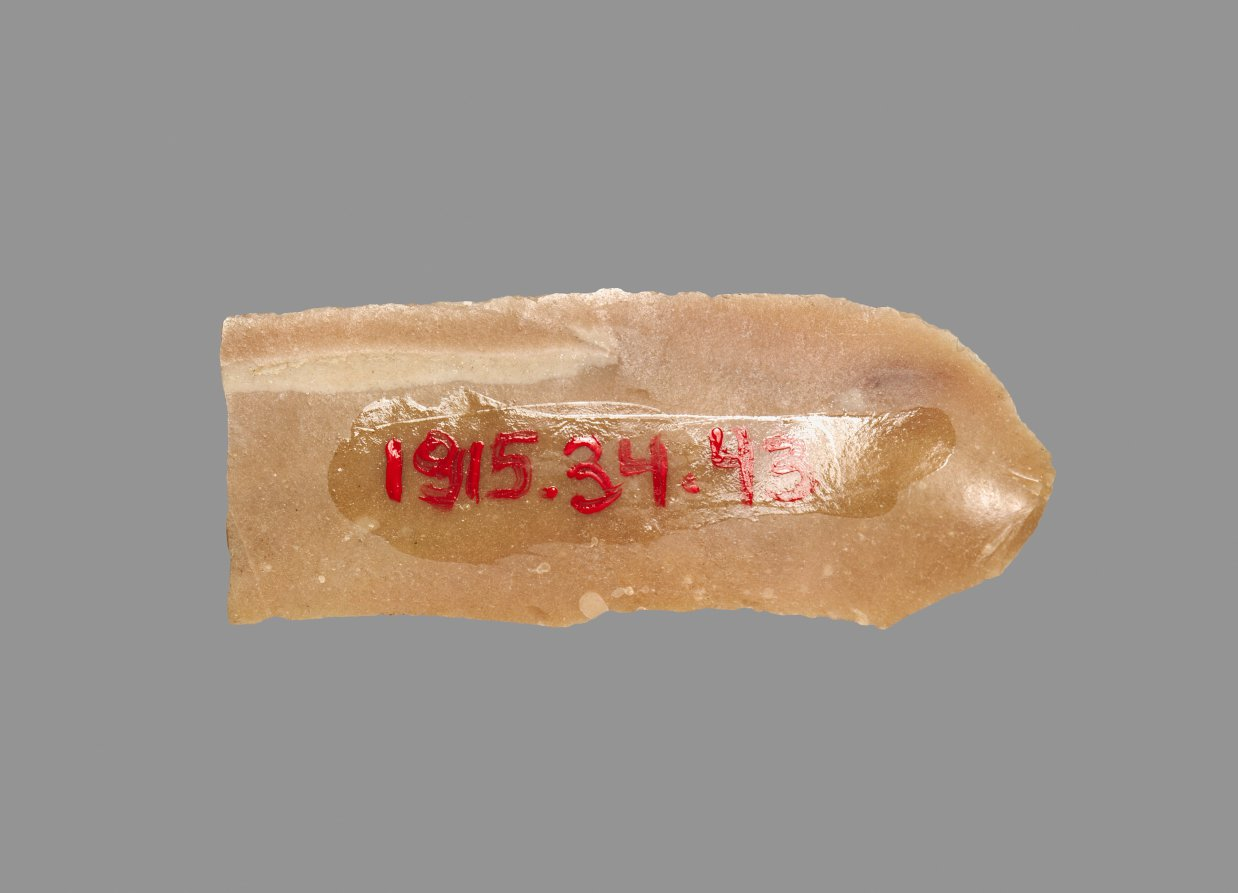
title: Sickle Blade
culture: Egypt, Middle Kingdom (2040–1648 BCE), Dynasty 12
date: 1980–1801 BCE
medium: flint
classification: Implements